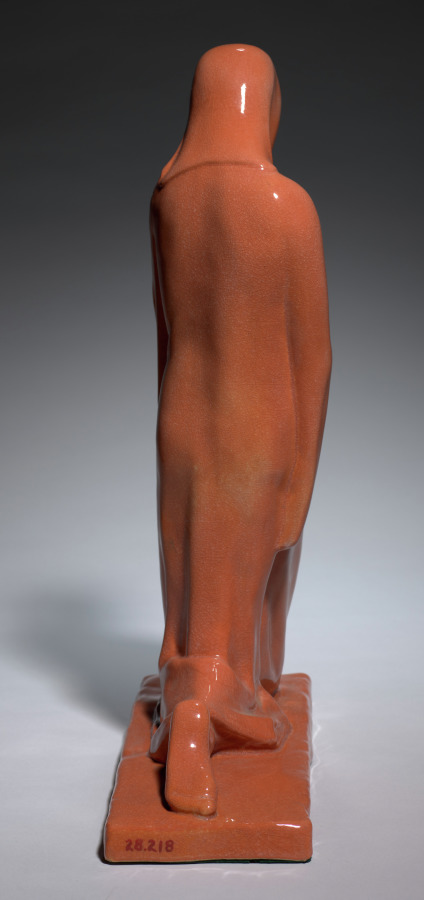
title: Madonna and Child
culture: America, Ohio, Cleveland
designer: R. Guy Cowan (American, 1884–1957)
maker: Cowan Pottery Studio (America, Ohio, Lakewood, 1913–1919)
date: c. 1928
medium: pottery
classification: Ceramic